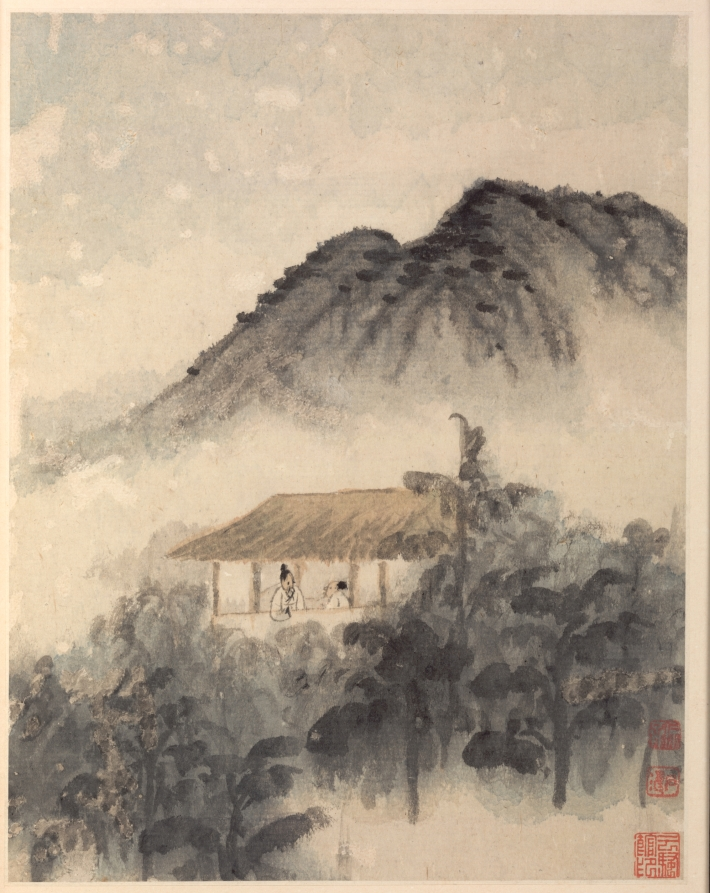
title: Reminiscences of Qinhuai River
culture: China, Qing dynasty (1644-1911)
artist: Shitao (Chinese, 1642–1707)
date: 1642–1707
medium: album leaf, ink and color on Song paper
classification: Painting